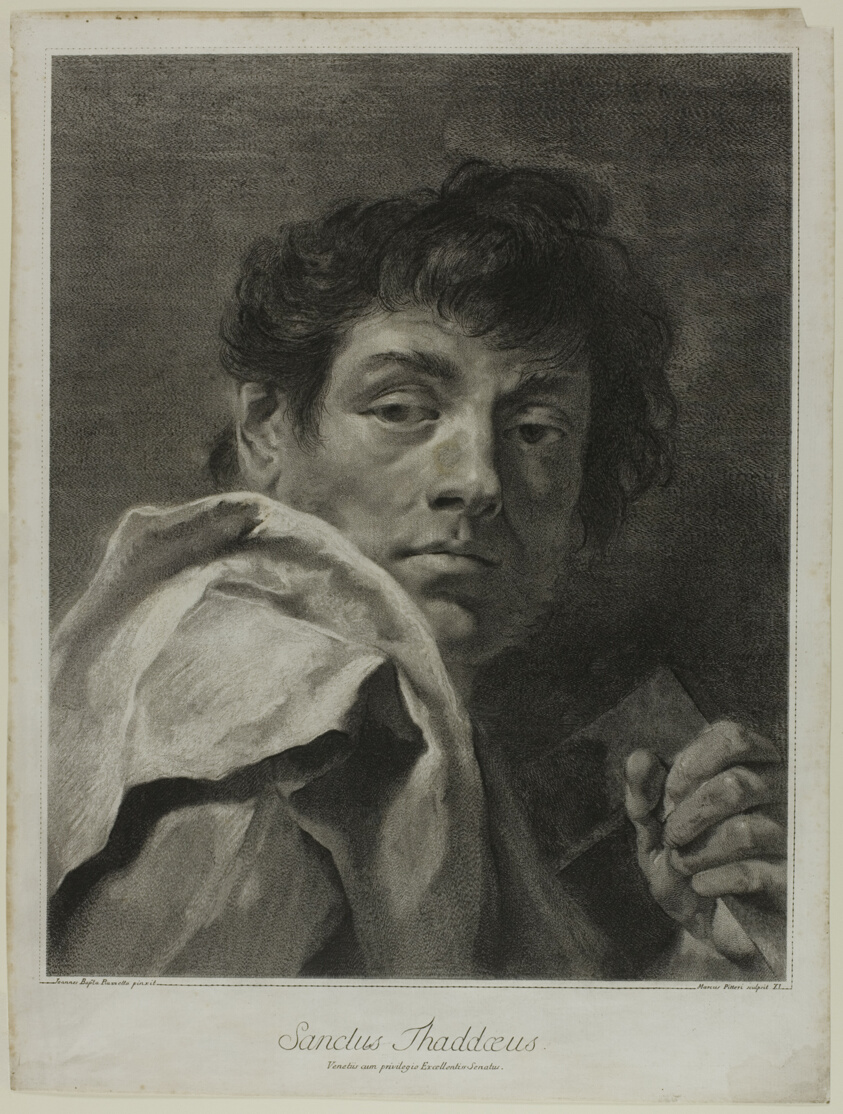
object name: Print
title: Saint Theodore, from The Holy Family and the Twelve Apostles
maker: Giovanni Marco Pitteri (Italian, 1702-1786); after Giovanni Battista Piazzetta (Italian, 1682-1754)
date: 1742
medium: Engraving in black on paper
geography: Italy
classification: engraving; print; prints and drawing